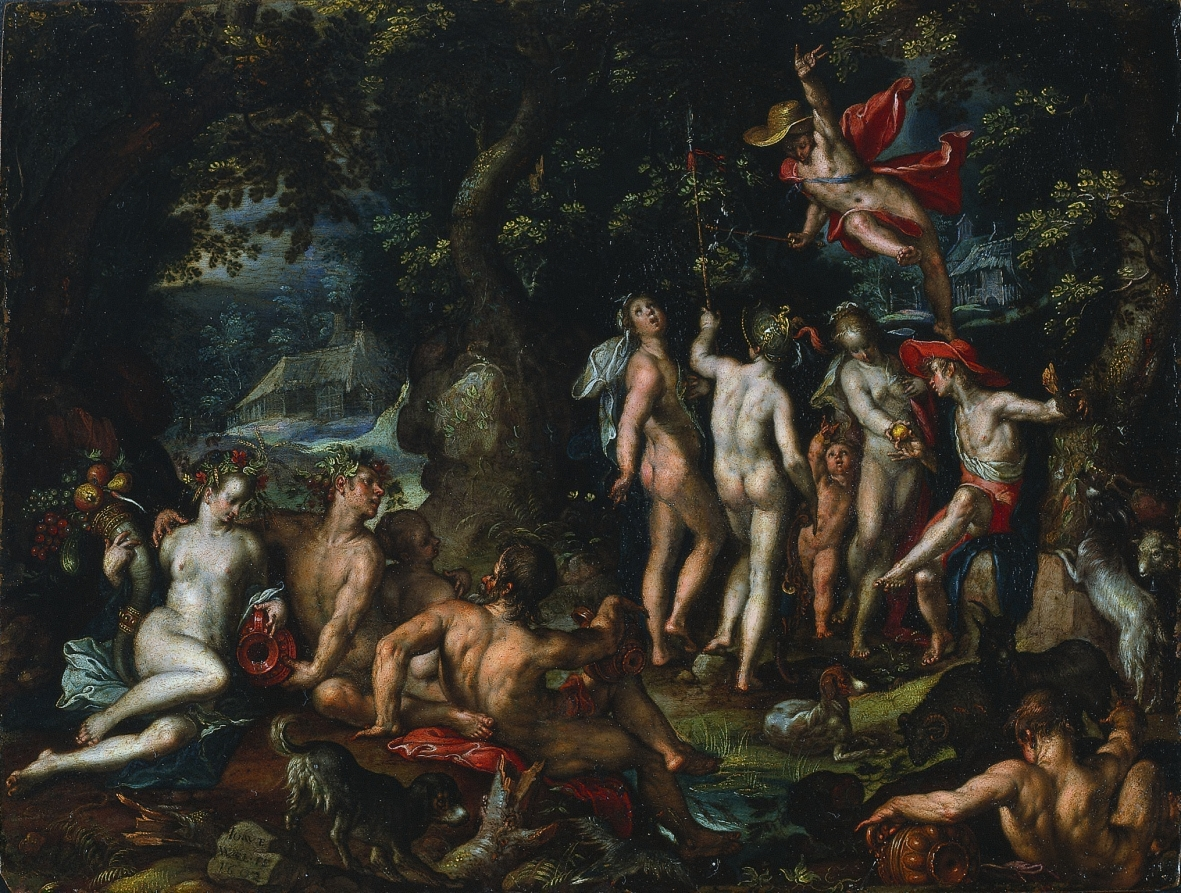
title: The Judgment of Paris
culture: Netherlands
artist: Joachim Anthoniz Wtewael (Dutch, 1566–1638)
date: 1602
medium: oil on copper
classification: Painting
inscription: signed lower left: IO. WTE / WAEL. FE / 1602 [TE, AE in monogram]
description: The Trojan prince Paris was asked to determine which goddess was the most beautiful. Hera (tothe left of the group) offered him political power, and Athena (seen from the back), military prowess, but Paris awarded the golden apple to Venus, the goddess of love, who promised him Helen, the most beautiful mortal in the world.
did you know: The artist dated and signed this work on a rock at the bottom right of the painting.